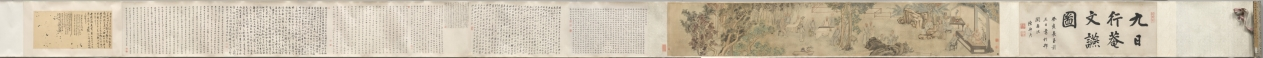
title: The Ninth Day Literary Gathering at Xing’an [Temporary Retreat]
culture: China, Qing dynasty (1644-1911)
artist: Fang Shishu (Chinese, 1693–1751)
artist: and Ye Fanglin (Chinese, active late 1600s–mid-1700s)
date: 1743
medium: Handscroll; ink and color on silk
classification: Painting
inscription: Fang Shishu's seal at beginning of painting: Ou ran shi de 偶然拾得. Ye Fanglin's seal at end of painting: Fanglin 芳林. Frontispiece title dated 1743 and 3 seals of Chen Bangyan 陳邦彦 (1678-1752).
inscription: 行庵在揚州北郭天寧寺西隅，馬君嶰谷半槎兄弟購僧房隙地所築，以為游息之處也。寺為晉謝太傅別墅。西隅饒古木，䨴鬱陰森，入林最僻，不知其近郛郭。庵居其中，無斲礱髤采之飾，惟軒庭多得清蔭，來憩者每流連而不能去。乾隆癸亥九日，積雨既收，風日清美，遂約同人，咸集於斯，中縣［懸］仇英白描陶靖節像，采黃花，酌白醪為供，乃以人世難逢開口笑，菊花雖插滿頭歸分韻賦詩。陶陶衎衎，觴詠竟日。既逾月，吳中寫真葉君敬［震］初適來，群貌小像，合為一卷，方君環山補景，命曰九日行庵文讌圖。裝池成，將各書所作於後，而囑鶚為之記。記按圖中共坐短榻者二人：右箕踞者，為武陵胡復齋先生期恆；左抱膝者，為天門唐南軒先生建中也。坐繩床者二人：中手牋者，歙方環山士庶；左仰首如欲語者，江都閔玉井華也。一人坐藤塾捻髭者，鄞全謝山祖望也。一人倚石坐若凝思者，臨潼張漁川四科也。樹下二人：離立把菊者，錢唐厲樊榭鶚；袖手者，錢唐陳竹町章也。一人憑石床坐撫琴者，江都程香溪先生夢星也。聽者三人：一人垂袖立者，祁門馬半查曰璐；二人坐瓷塾，左倚樹、右跂腳者，歙方西疇士疌 、汪恬齋玉樞也。二人對坐展卷者，左祁門馬嶰谷曰琯，右吳江王梅沂藻也。一人觀者，負手立於右，江都陸南圻鐘輝也。從後相倚觀者一人，歙洪曲溪振珂也。童子種菊者三人：樹間侍立者一人，撰杖、執卷者各一人。其植有蕉、有竹，又有雜樹，作丹黃青碧之色，紀時也。夫重九佳名，舉俗所重，而高常侍歎獨坐而搔首，陸天隨感登高以剫門，無其時地與人耳。今吾儕幸生太平，遇勝地，又皆素心有文之侶，固人世不可多得之會；而此十六人者，或土斷，或客游，聚散不常。異日者，歲月遷流，撫節物以有懷，一披此圖，悅如晤對。將來覽者，或亦不異此意乎。甲子夏五十有四日厲鴞記並書。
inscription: 揚州為江北大都會，居民連甍接楹，笙歌輿從，竟日喧聚，其於淸歌雅集，葢罕矣。城北天寧寺，為晉謝公駐節時所游息，其中有行庵，吾友馬君嶰谷、半查兄弟之小築也。地不踰五畝，而老樹古藤，森蔚相望，皆千百年物，間以修竹，春鳥秋蟲，更唱迭和，其間曲廊高榭，位置閑適。出門未數百步，即黃塵濁流極目，令人作惡。而此中獨蕭然有人外之思。乾隆八年九日，嶰谷兄弟招集同社一十四人祀陶公，出所藏仇實父白描像懸於閣上，各賦一詩。予方留滯西泠，未得預也。又踰旬而予至，諸君方擬繪圖記事，嶰谷曰：是不可無君。乃以展日更舉，令予得陪卷軸之末；而洪君曲溪，兩度皆以病失約，然故吟社中人也，亦補入焉。予太息謂諸君曰：謝公之風流，千古如在；然其游息於斯也，則與東山賓從之樂稍不同矣。公之為是行也，蓋以符氏之亂，思北定中原也。而其時公巳困於讒口，不自安於朝；雖在河朔極有可乘之會，而神明內索，徘徊不克自前。老師左次，竟無尺寸之功，坐失事幾。吾常過邵伯之埭，吊法雲之荒祠，未嘗不喟然累啼，以為明德之衰也。至若九日嘉名，陶公高格，固在羲皇懷葛之間；然而讀其 止酒之詩，蒼梧漢水之感，以瘦詞寄其孤憤則夫黃花白酒，蓋亦不得巳而漫與焉者。今吾輩生逢太平之日，書淫墨癖，是處留連，胸次中了無一事，為江湖之幸民，論人雖甚媿，論其時與地，則不可不私相慶也。諸君曰：善。圖之詳巳見於厲君樊榭記中。予之許為嶰谷兄弟序斯圖也，三年於茲；今夏重披圖捉筆，而唐丈南軒，巳化為異物矣。對酒當歌，人生幾何，願與諸君並日相遇從焉。丙寅夏杪孤山社小泉翁全祖望序。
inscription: 6 additional colophons and 15 additional seals: 1 colophon, dated 1746, and 1 seal of Huang Zhijun 黃之雋 (1668-after 1746); 1 colophon and 2 seals of Zha Xiang 查祥 (1718 jinshi); 1 colophon, dated 1746, and 3 seals of Zhang Siwen 張思問; 1 colophon, dated 1748, and 4 seals of Shao Dong 卲東 (1721 jinshi); 1 colophon, dated 1753, and 2 seals of Fang Shiju 方世舉 (signing as Fang Funan 方扶南); 1 colophon, dated 1808, of Ruan Yuan 阮元 (1764–1849); 3 seals unidentified.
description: By the 1700s, Yangzhou was flourishing both economically and culturally as the most prosperous city in China, having surpassed all other Jiangnan cities in their creation of gardens. This group portrait commemorates a literary gathering in the private garden of the salt merchants and art patrons Ma Yueguan (1688–1755) and his brother Ma Yuelu (1697–after 1766) in Yangzhou. Ma Yueguan received imperial recognition for providing financial aid and food relief for those affected by flood and drought. Ma Yueguan is seen seated at the end of the painting holding an open scroll while Ma Yuelu stands behind the qin instrument player. Among the guests were officials, scholars, poets, painters, and merchants, a mix of local members of a poetry club reflecting increasing social diversity.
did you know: The two hosts and their fourteen guests were all officials, scholars, poets, painters, and salt merchants.